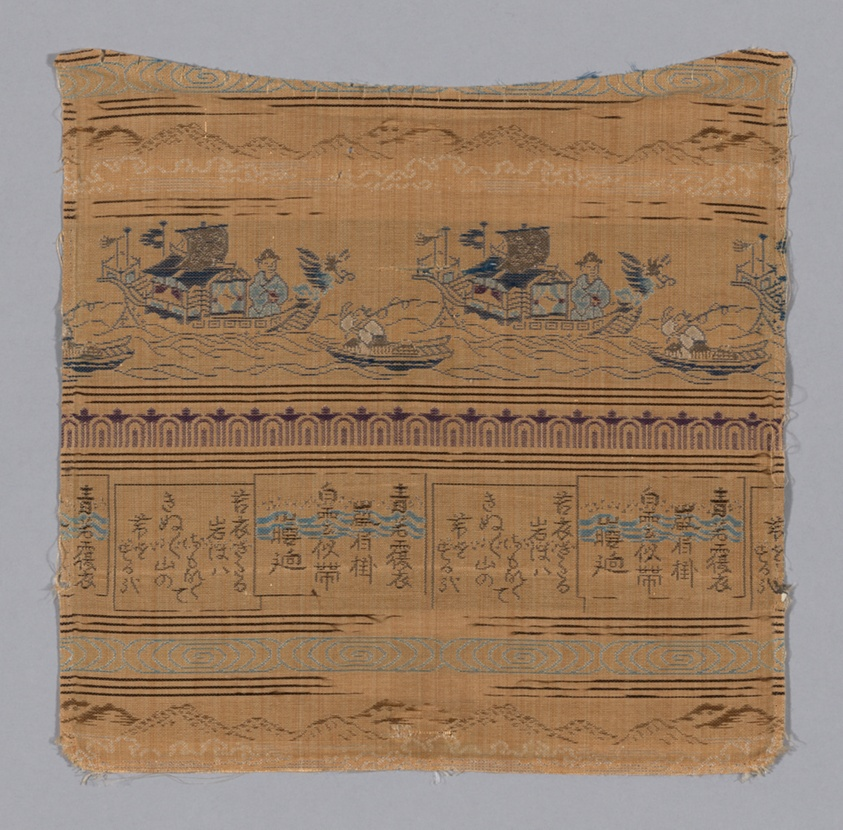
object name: Textile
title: Fragment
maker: Japan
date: late Edo period (1789–1868)/ Meiji period (1868–1912), 19th century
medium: Single plain compound cloth, silk & silvered paper; 2 strips to m.m.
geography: Japan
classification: textile; weaving